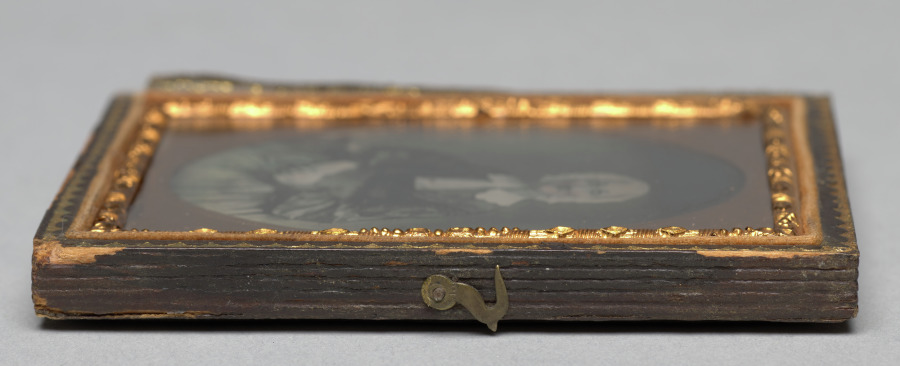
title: Seated old woman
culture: America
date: c. 1864–65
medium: ambrotype, tinted, sixth plate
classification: Photograph